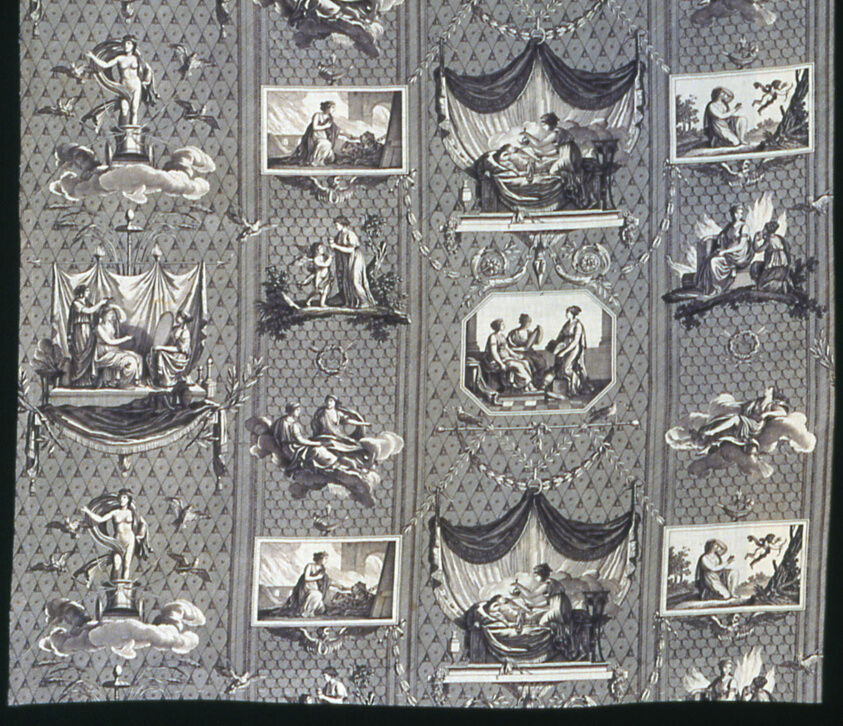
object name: Textile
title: L'Historie de Psyche (The Story of Psyche) (Furnishing Fabric)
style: jouy-en-Josas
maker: Designed by Jean Baptiste Huet (French, 1745–1811) after Pierre-Paul Prud'hon (French, 1758–1823) and others; Manufactured by Christophe-Philippe Oberkampf (naturalized French, 1738-1815), Oberkampf Manufactory (French, 1760-1843); Jouy-en-Josas, France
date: c. 1810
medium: Cotton, plain weave; engraved roller printed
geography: Jouy-en-Josas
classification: textile; weaving - printed; furnishing textile